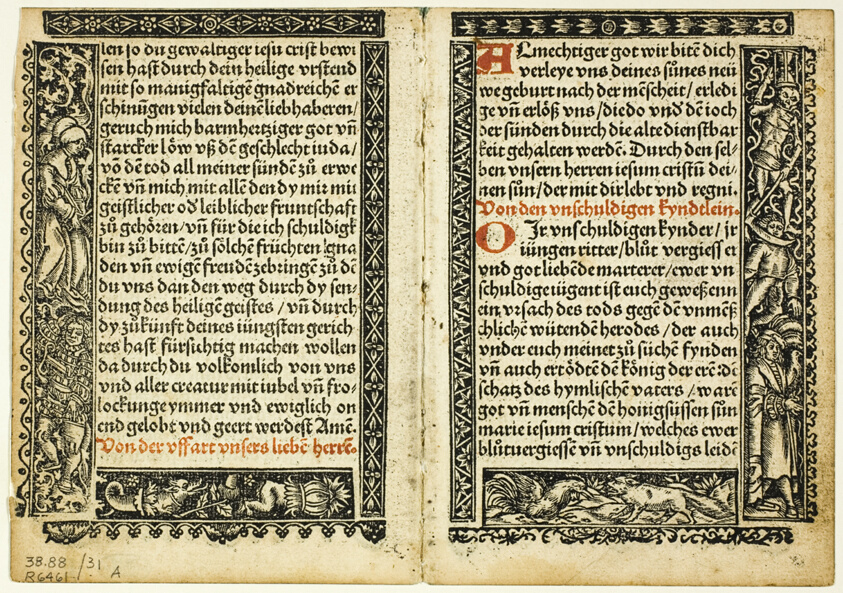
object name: Print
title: Illustration from Hortulus animae, plate 31 from Woodcuts from Books of the XVI Century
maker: Unknown Artist (German, 16th century); assembled by Max Geisberg (Swiss, 1875-1943)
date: 1514, assembled into portfolio 1937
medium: Woodcut on paper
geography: Germany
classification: woodcut; print; prints and drawing